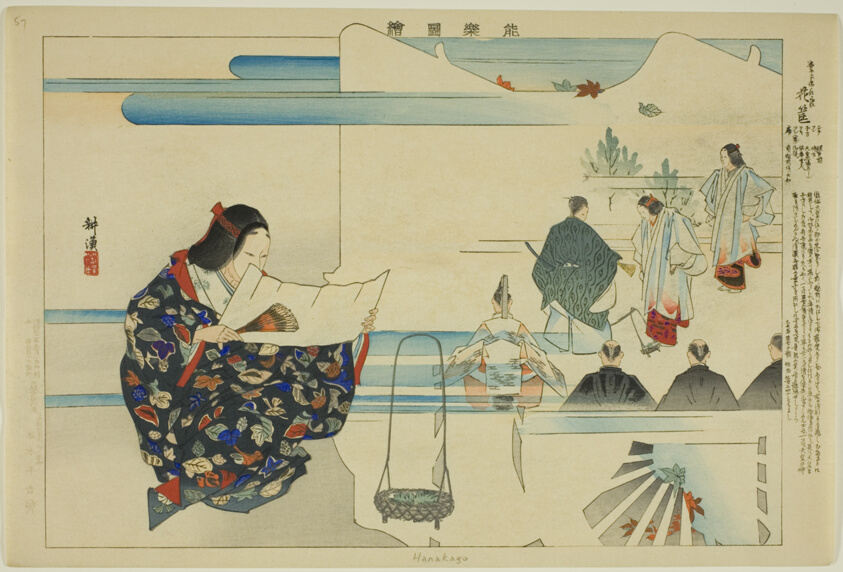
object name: Print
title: Hanakago, from the series "Pictures of No Performances (Nogaku Zue)"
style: Japanese (culture or style)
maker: Tsukioka Kogyo; Japanese, 1869-1927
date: 1898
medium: Color woodblock print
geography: Japan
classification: woodblock print; print; asian art